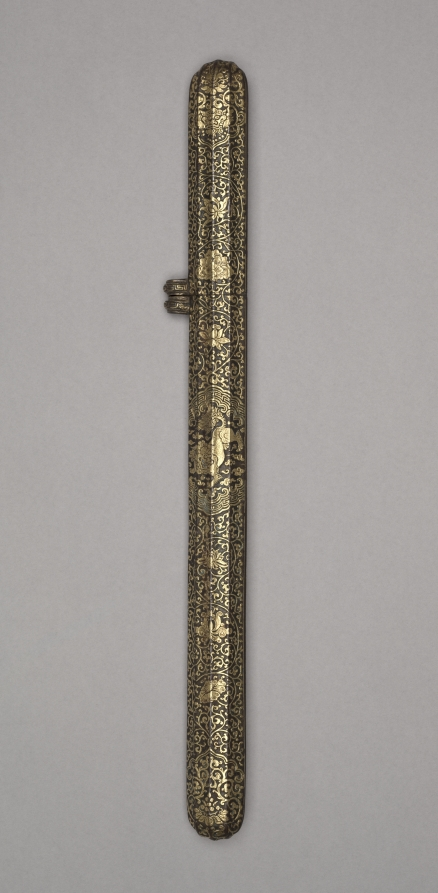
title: Sheath for a Dagger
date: c. 1600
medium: case: iron alloy with gold inlay; pen: feather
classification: Arms and Armor